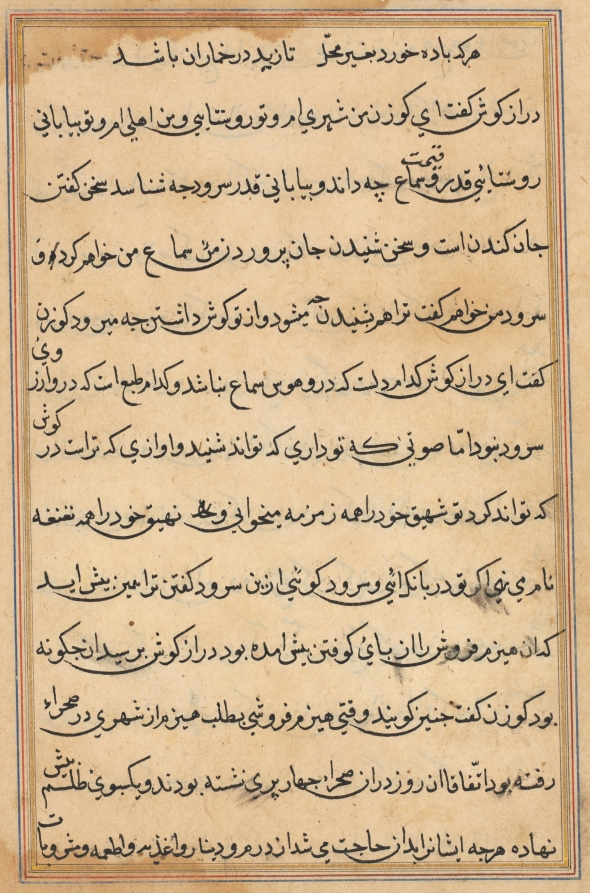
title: Page from Tales of a Parrot (Tuti-nama): text page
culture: Mughal India, court of Akbar (reigned 1556–1605)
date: c. 1560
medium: gum tempera, ink, and gold on paper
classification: Painting